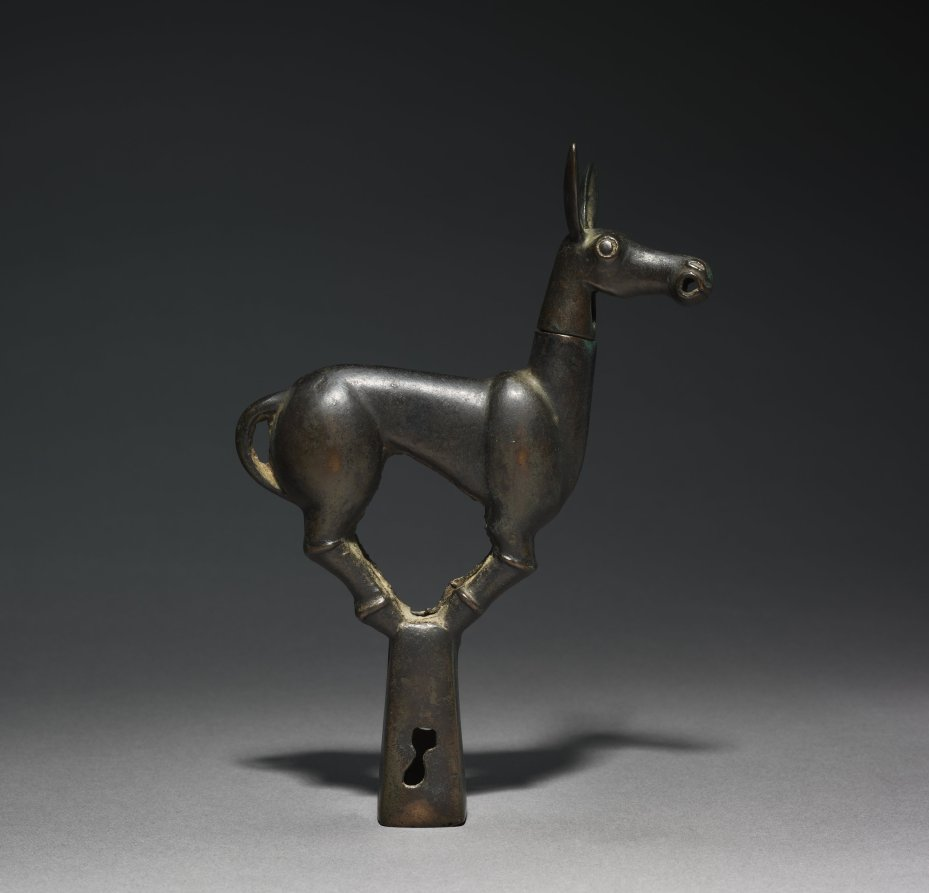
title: Pole Top as a Wild Ass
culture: China, Ordos Region, Han dynasty (202 BCE–220 CE)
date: 206 BCE–220 CE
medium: bronze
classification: Sculpture